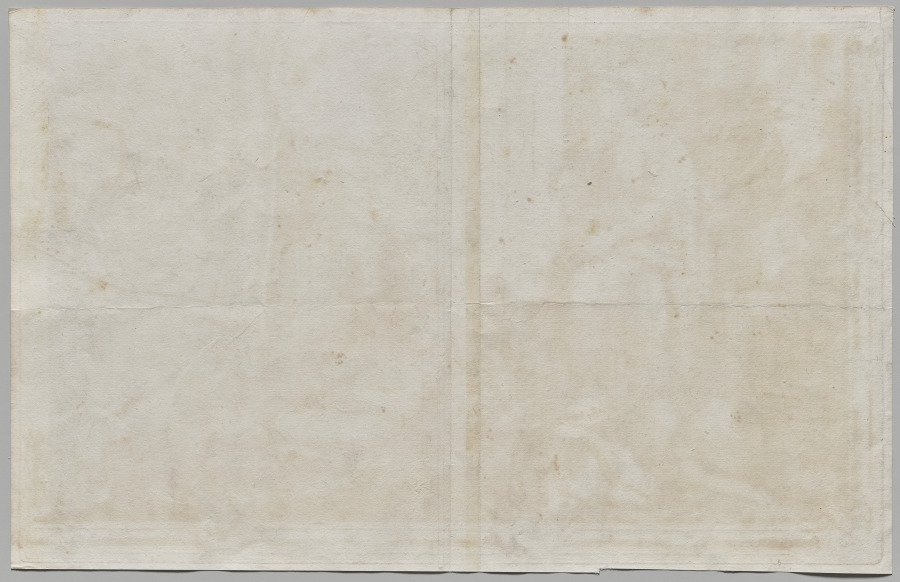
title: Nuova pianta di Roma data in luce da Giambattista Nolli l’anno MDCCXLVII, known as La Pianta Grande di Roma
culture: Italy, 18th century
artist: Giovanni Battista Nolli (Italian, 1701–1756)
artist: Carlo Nolli (Italian, 1690–1790)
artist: Rocco Pozzi (Italian, 1701–1774)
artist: Pietro Campana de Soriano (Italian, 1725–c. 1779)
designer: Stefano Pozzi (Italian, 1699–1768)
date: 1748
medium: etching and engraving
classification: Print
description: The monumental Pianta Grande di Roma, or Large Plan of Rome, which measures about 5 x 7 feet when its twelve plates are assembled, is a landmark in both cartography and printmaking. The map is considered the first scientific rendering of Rome, establishing new standards of accuracy and thoroughness when it was published in 1748. Devised by the Lombard architect and surveyor Giovanni Battista Nolli (Italian, 1701-56), the creation of the map required over ten years of surveying the city carried out by Nolli and a team of assistants with the help of new measuring devices. In Nolli’s “ichnographic” (also called “ground”) plan, architectural features and the urban infrastructure are reduced to a single horizontal slice, a minutely detailed footprint that conveys dimensions, proportions, and orientations to scale with the utmost clarity.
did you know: To make this map, Pope Clement XII granted the mapmaker permission to measure courtyards and other interior, inaccessible spaces in monastic communities, even those in nuns’ convents, which was controversial at the time.